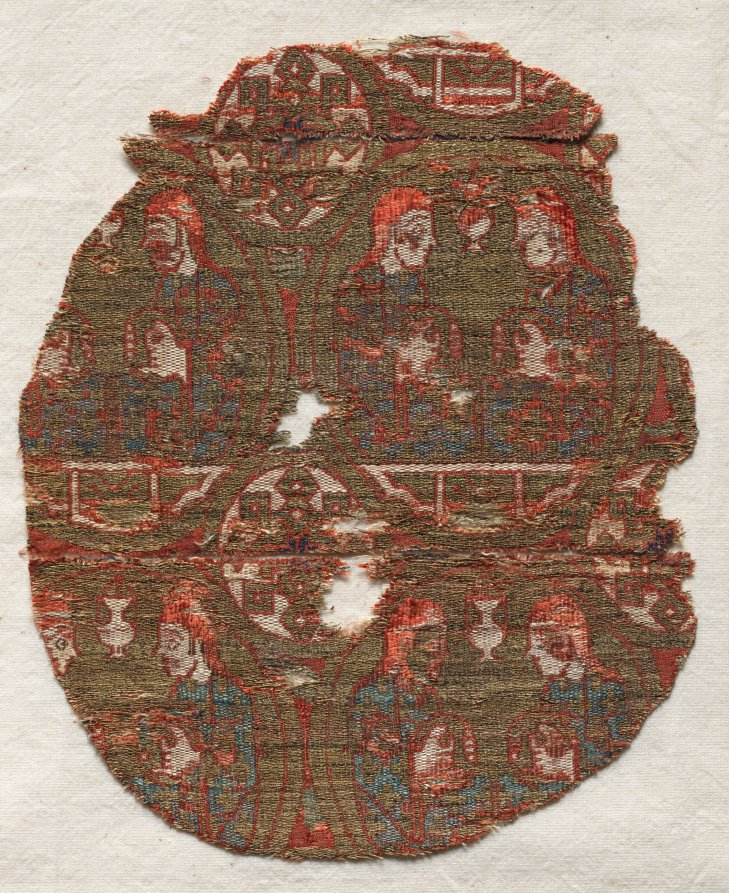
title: Fragment with musicians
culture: Spain, probably Almeria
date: 1200s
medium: Silk and gold thread: lampas weave with areas of double cloth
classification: Textile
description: The repeating pattern features female musicians playing tambourines. They wear long blue and blue-green robes in alternate rows. A lamp hangs between them, suggesting an evening setting. Traces of their black hair peek out from under red headdresses. This textile, along with several other fragments, was found within the pages of a Christian manuscript in the Cathedral of Vich, near Barcelona in northeastern Spain.